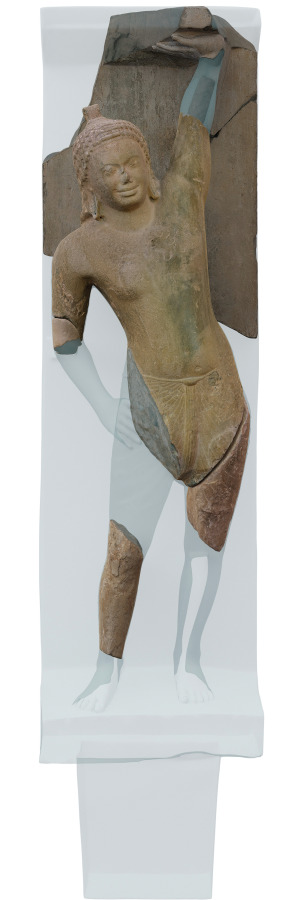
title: Krishna Lifting Mount Govardhan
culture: Southern Cambodia, Takeo Province, Phnom Da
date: c. 600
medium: Sandstone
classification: Sculpture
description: This masterwork of early Cambodian sculpture shows the Hindu god Krishna effortlessly holding aloft a mountain to protect his fellow villagers and herds from torrential storms sent by a jealous old god. It is one of eight monumental monolithic figures recovered from a two-peaked mountain in the floodplains of the Mekong River delta, on the outskirts of the ancient urban center of Angkor Borei.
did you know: Gold earrings were once fastened to the sculpture using holes in the figure's earlobes.